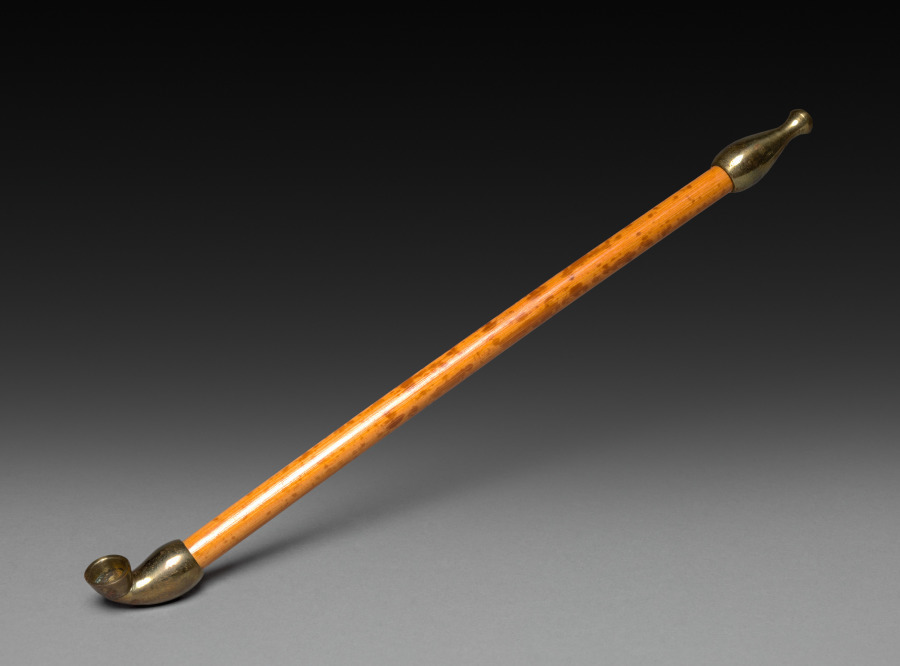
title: Tobacco Pipe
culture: Japan, Edo period (1615–1868) to Meiji period (1868–1912)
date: 1800s–1900s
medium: bamboo and brass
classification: Miscellaneous